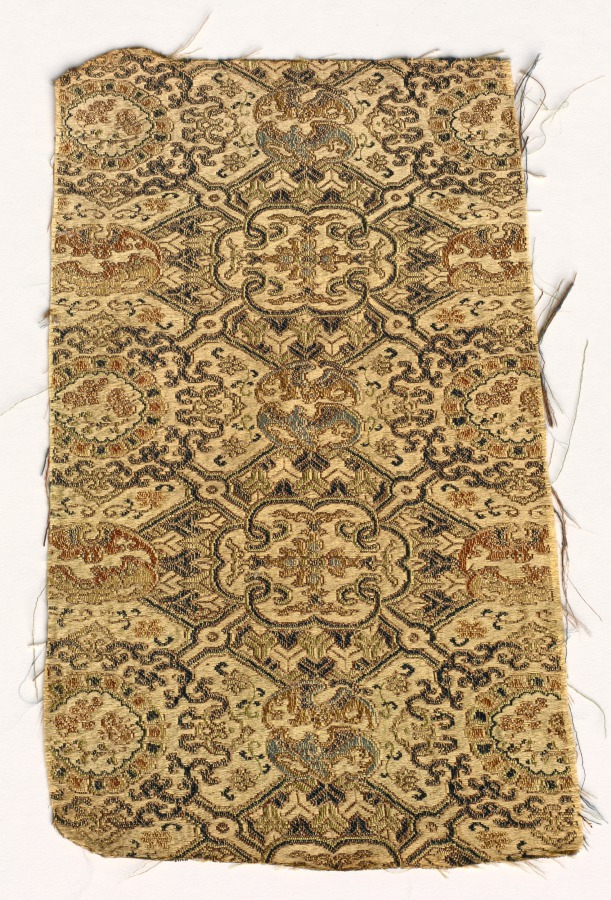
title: Fragment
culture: China, 19th century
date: 1800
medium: silk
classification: Textile